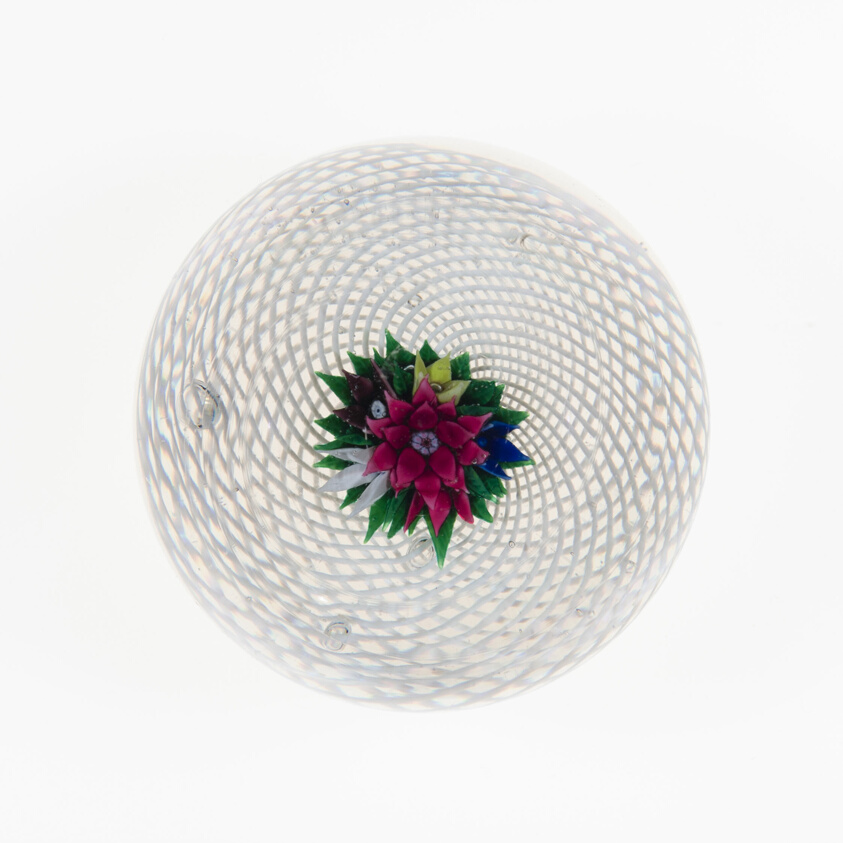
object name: Glass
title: Paperweight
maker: Boston and Sandwich Glass Company (Sandwich, Massachusetts, 1826-1888)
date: c. 1850–1900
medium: Glass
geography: Sandwich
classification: paperweight; glass; european decorative arts